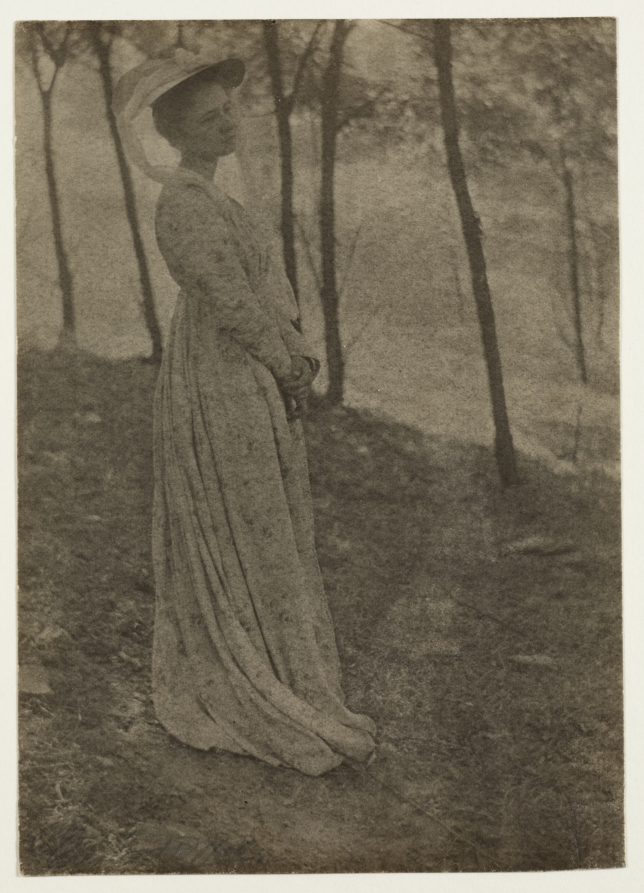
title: Julia Hall McCune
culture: America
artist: Clarence H. White (American, 1871–1925)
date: c. 1897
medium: platinum print with pencil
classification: Photograph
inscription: Written in pencil on verso: "44 [circled]"; "Portrait of Julia McCune / by / Clarence White / about 1897(?)"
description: Clarence H. White experimented with an array of artistic media that blurred the lines between photography, drawing, and printmaking. Here are two examples of that experimentation: a platinum print on the left and a photogravure on the right. White was likely drawn to both processes for their broad tonal range and interaction of image and paper. To create platinum prints, a light-sensitive liquid emulsion is applied to and absorbed by the paper. The image forms within the paper’s fibers, resulting in a matte appearance. Because photogravures are printed like an etching, the image is formed with ink impressed onto the paper’s surface.